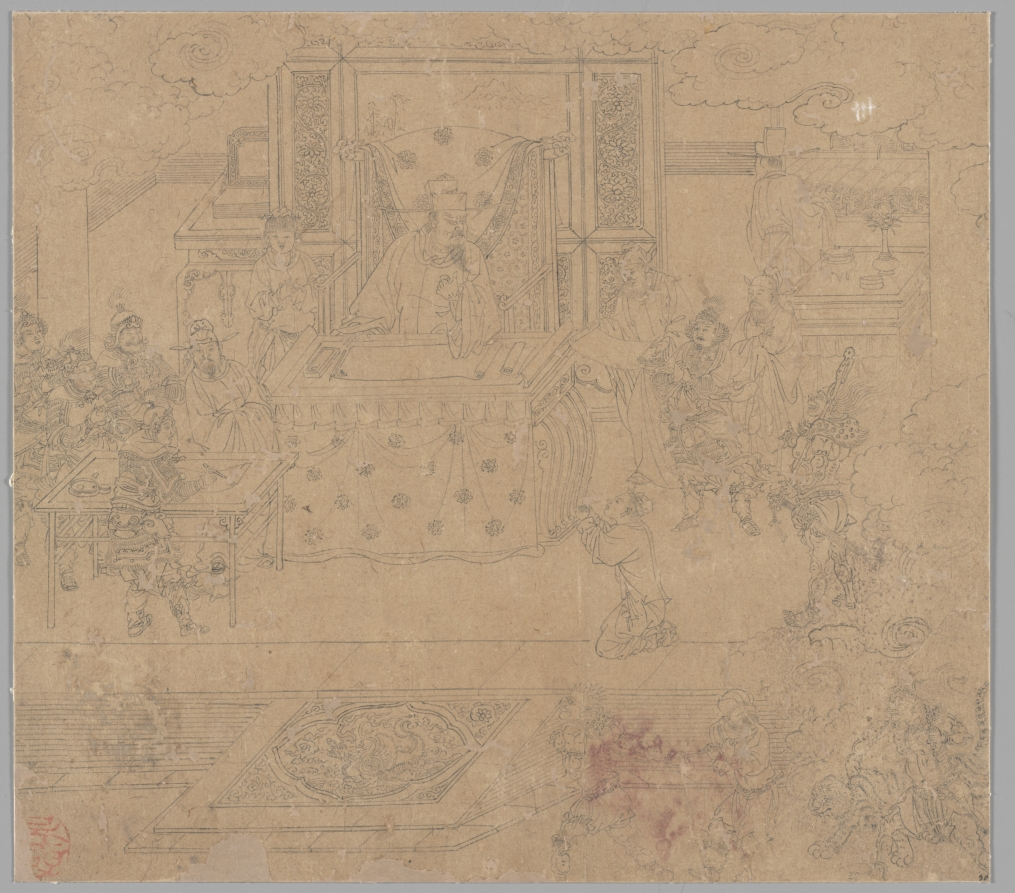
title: Album of Daoist and Buddhist Themes: Kings of Hells: Leaf 30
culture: China, Southern Song dynasty (1127-1279)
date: 1200s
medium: Album, ink on paper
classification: Painting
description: This extraordinary album has 50 paintings on a variety of religious subjects. They were likely created by several master craftsmen to share with studio apprentices as models for fulfilling commissions. The Jade Emperor and the Daoist pantheon make up the first 26 leaves. The next 14 leaves portray the Buddhist Ten Kings of Hell administering punishments to the dead. The third section, called “Clearing the Mountains,” features divine soldiers, led presumably by the deity Erlang Shen 二郎神, fighting undesirable creatures.